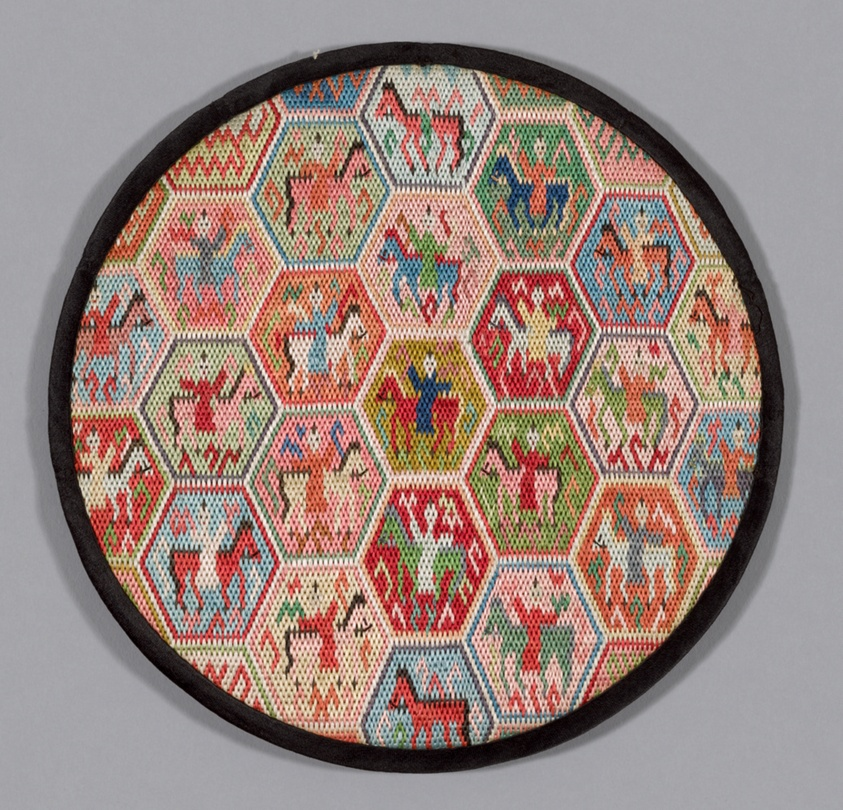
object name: Costume and Accessories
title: Mirror Case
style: qing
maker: China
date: Qing dynasty (1644–1911), 1875/1900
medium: Embroidered with figures on horseback, embroidery on gauze.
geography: China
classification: textile; needlework (visual works); accessories (object genre); weaving; costume